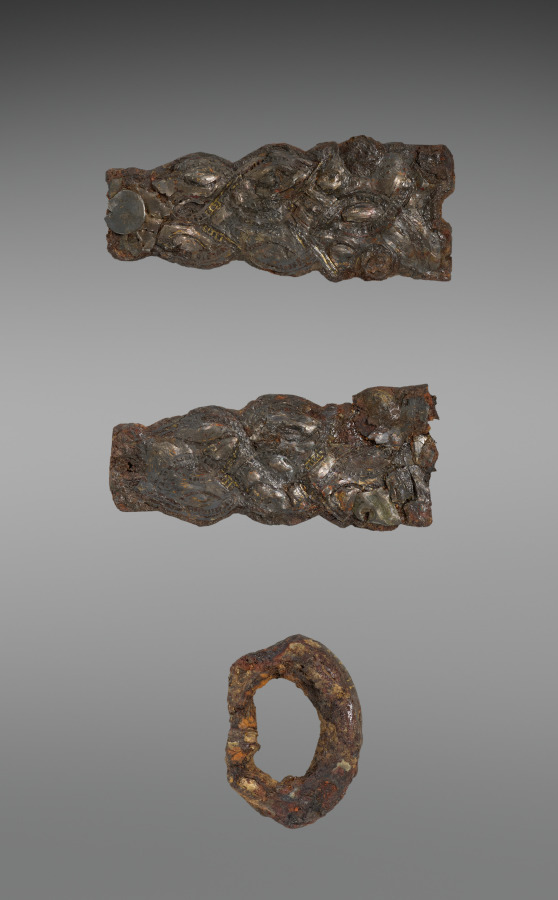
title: Buckle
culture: Merovingian, Burgundian, Migration period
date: 600s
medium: iron with silver overlay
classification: Jewelry